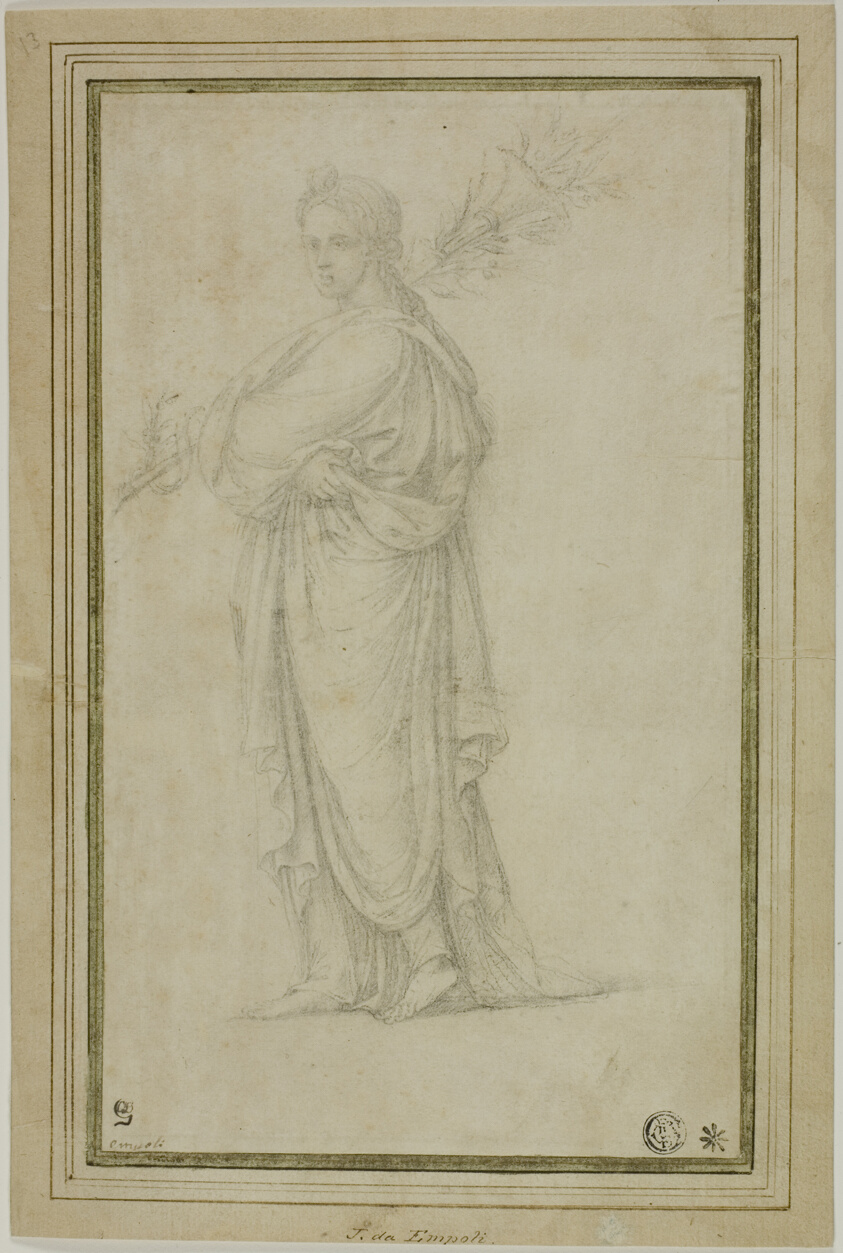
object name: Drawing and Watercolor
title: Standing Draped Female Figure Carrying Trumpet, Flowers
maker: Circle of Girolamo Sellari, called Girolamo da Carpi; Italian, 1501-1556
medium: Black chalk on ivory laid paper, laid down on ivory laid paper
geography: Italy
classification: chalk; drawings (visual works); prints and drawing